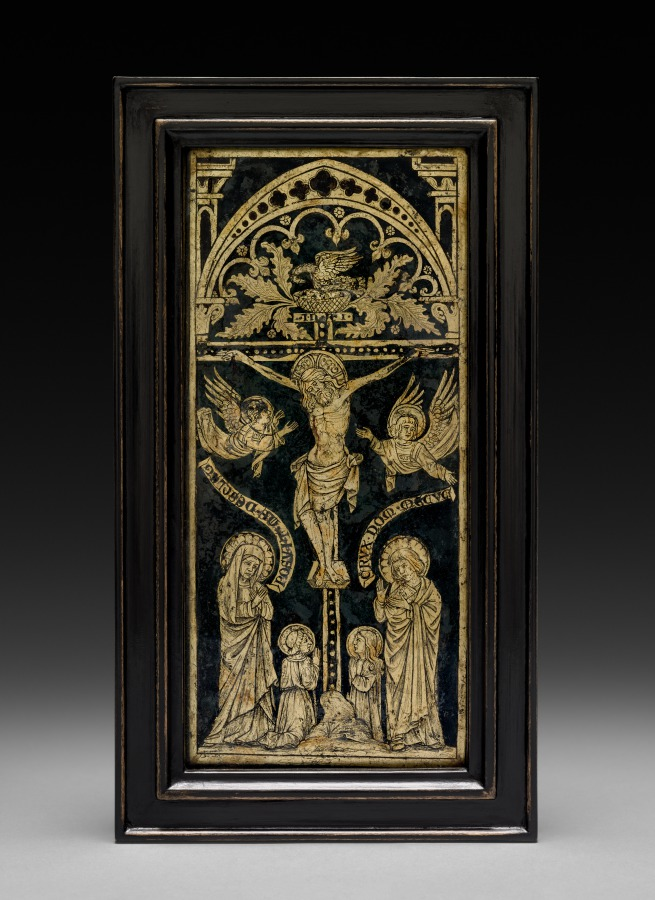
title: Plaque: The Crucifixion with Angels and Saints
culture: Northern Italy, Padua?, 15th century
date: c. 1400–1425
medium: verre églomisé (reverse gilded glass, engraved and painted)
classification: Glass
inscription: the letters on the banderoles may be described as a composite script called Gothic majuscule, which intermingles Roman capitals and uncial alphabets. This script was especially favored by Italian artists for inscriptions in architecture, sculpture, panel painting, and manuscript illustrations during the 14th and 15th centuries. The banderole on the left reads: "POSVIT. ME. DESOLAT.[UM]" (God has forsaken me); the other banderole reads: "CRUS. DOMINI. MECUM" (the cross of the Lord is with me). A third inscription with the abbreviations for the words of Pilate--"I. N. R. I." (IESUS, NASARENUS RES IUDAEORUM), or Jesus of Nazareth, the King of the Jews" appears on the plaque (tabula ansata) at the top of the cross.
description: Small glass plaques like this were often combined with plaques of painted wood and framed within elaborate architectural reliquaries or small altarpieces. The decorative technique, called verre églomisé, is a process in which the reverse side of a glass is gilded and then engraved with designs. The pelican, shown above the cross piercing its breast to feed its young, became a common symbol of Christ's sacrifice on the cross.